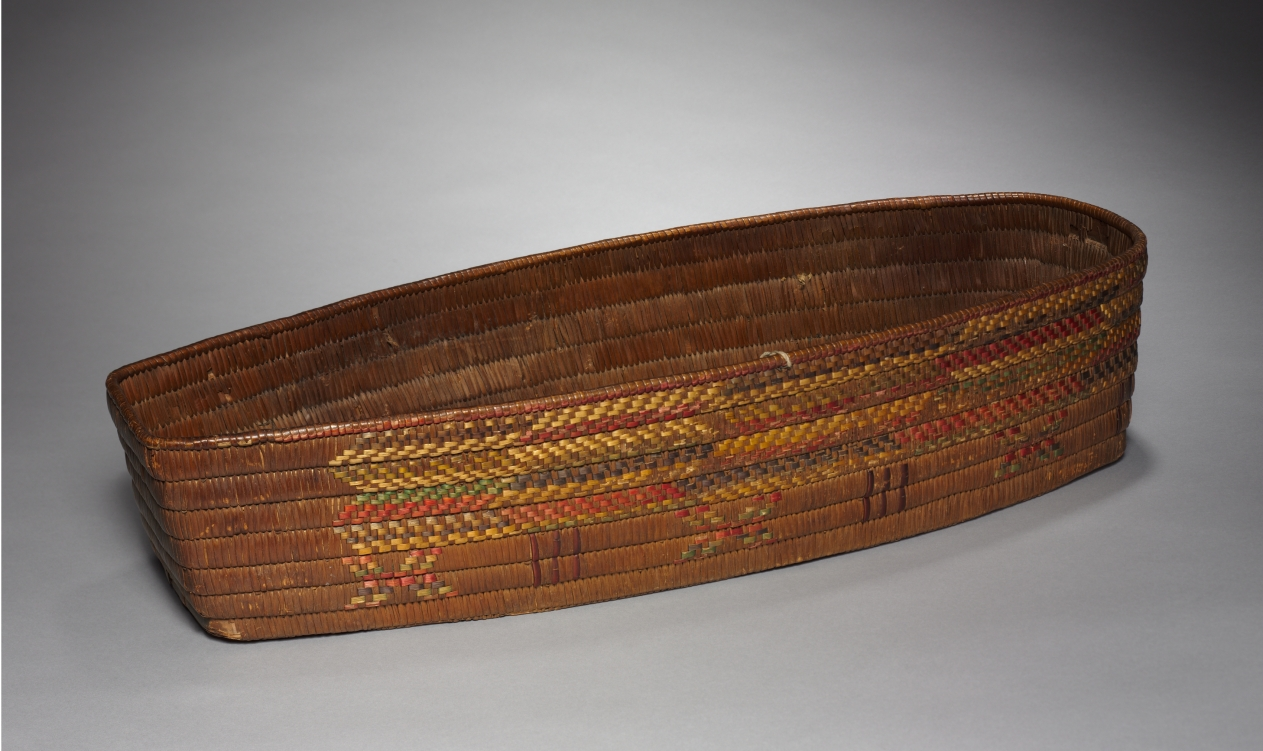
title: Baby Basket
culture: Northwest Coast, Frazer River, Salish, Late 19th century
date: c 1875– 1910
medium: basketry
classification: Basketry